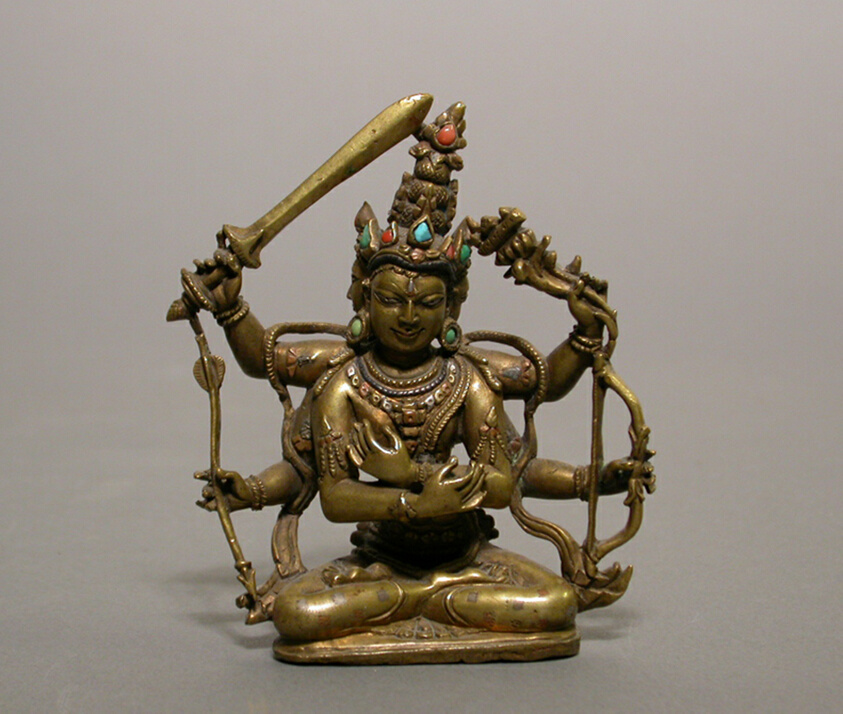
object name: Sculpture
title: Guhyasamaja Manjuvajra, an Esoteric Form of Bodhisattva Manjushri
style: Himalayan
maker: India; Bengal or Bihar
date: Pala period, 12th century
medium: Brass with silver, copper, turquoise, and coral inlay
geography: Bihar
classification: brass; metal; sculpture; asian art